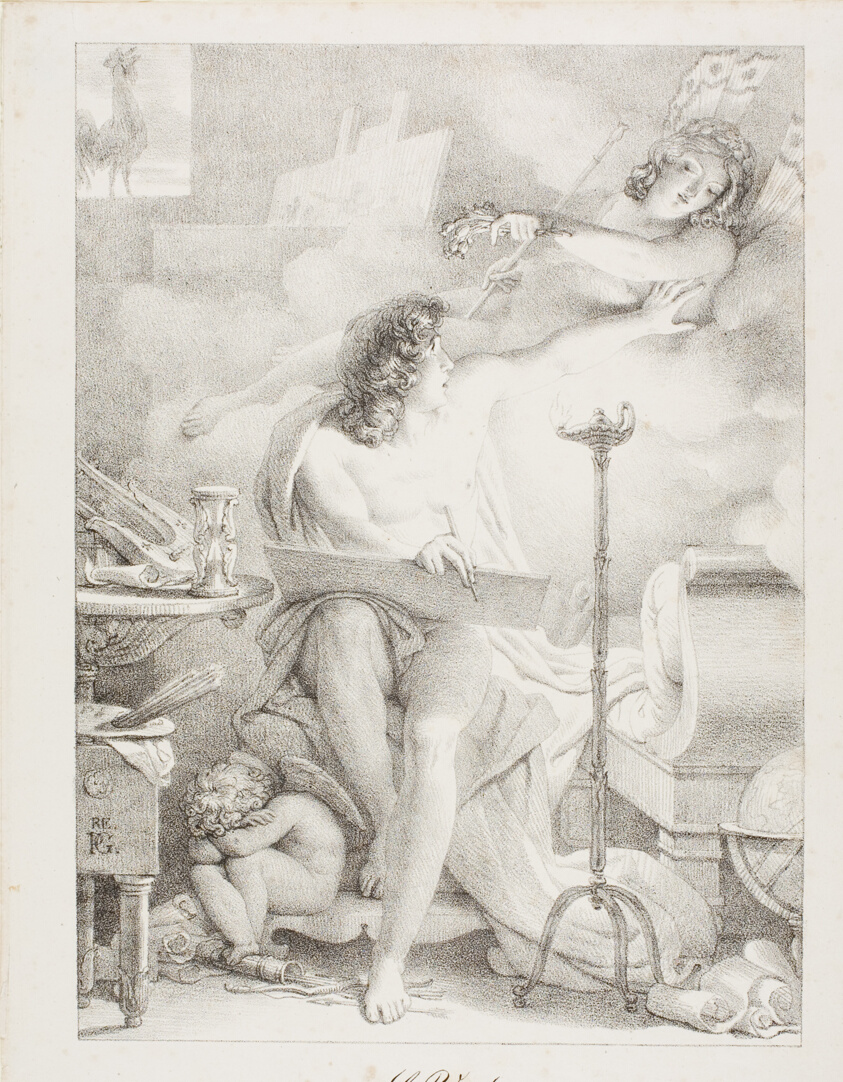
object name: Print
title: Vigilant One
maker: Pierre Guérin (French, 1774-1833); printed by Gottfried Engelmann (French, 1788-1839)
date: 1816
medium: Lithograph in black on cream wove paper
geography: France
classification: lithograph; print; prints and drawing